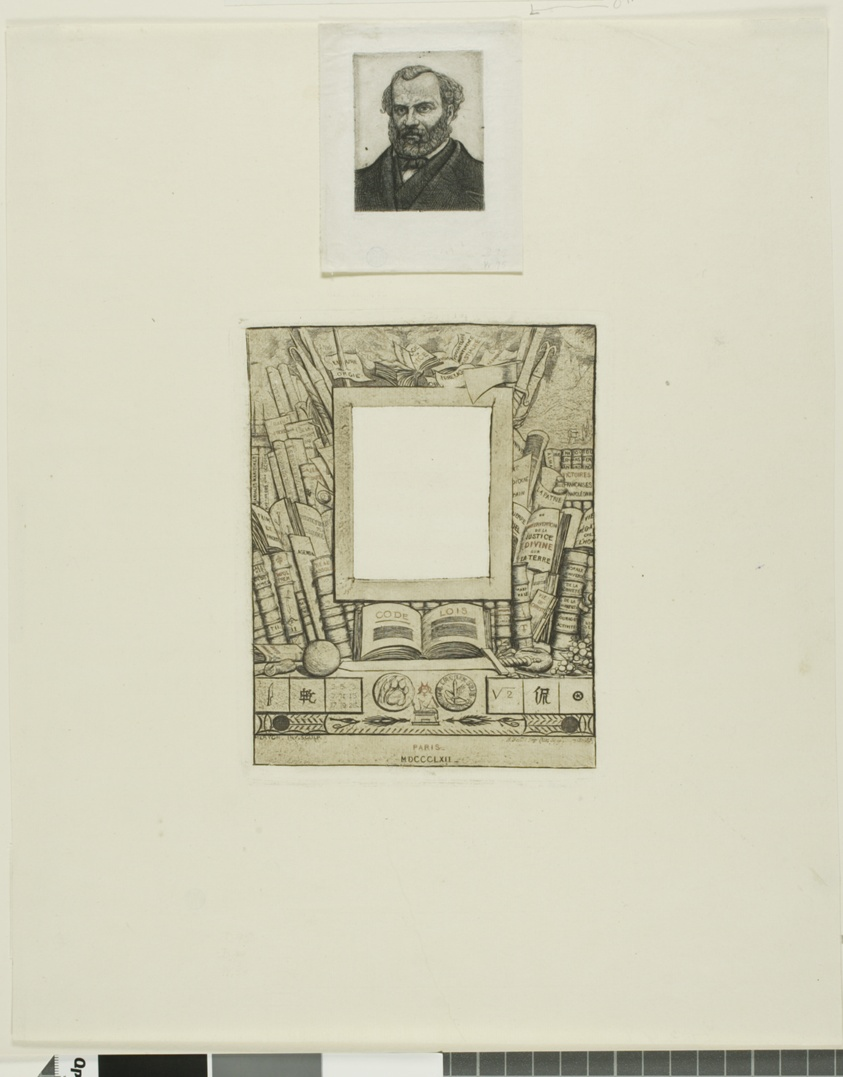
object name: Print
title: Design for a Frame for the Portrait of Armand Guéraud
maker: Charles Meryon (French, 1821-1868); printed by A. Beillet (French, 19th century)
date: 1862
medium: Etching in warm black with some printing à la poupée in copper ink, on ivory laid paper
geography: France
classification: etching; print; prints and drawing